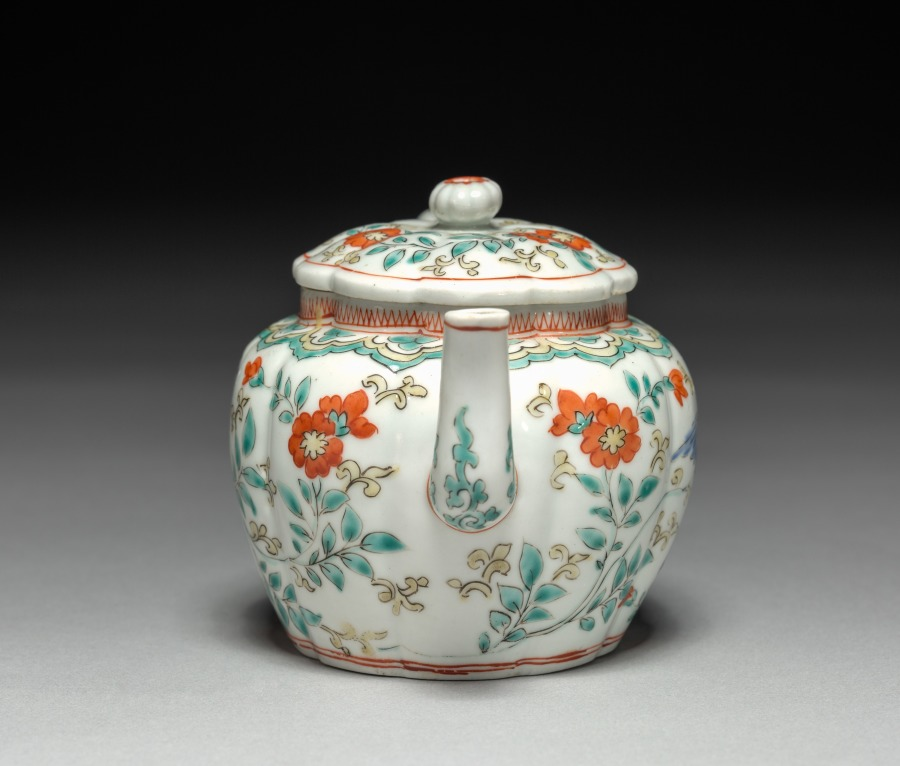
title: Teapot with Birds and Flowers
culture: Japan, Edo period (1615–1868)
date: 1700s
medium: Porcelain with overglaze color enamel (Arita ware)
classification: Ceramic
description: This small vessel was likely made as a teapot for the European export market. The different colored overglaze enamels, orange, blue, green, and yellow, combine with a wiry black outline to form the design of a singing bird on a flowering bough repeated on each side of the pot.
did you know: The wood storage box for this pot refers to it as a suichū, which means water ewer.